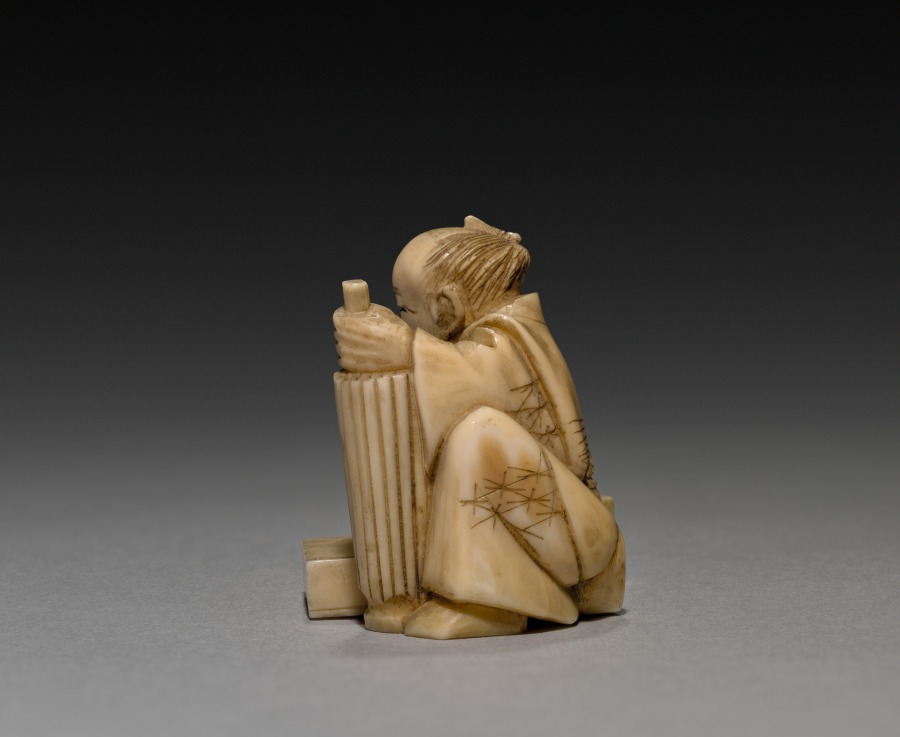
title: Parasol Vendor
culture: Japan, Meiji period (1868–1912)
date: late 1800s-early 1900s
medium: ivory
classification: Ivory